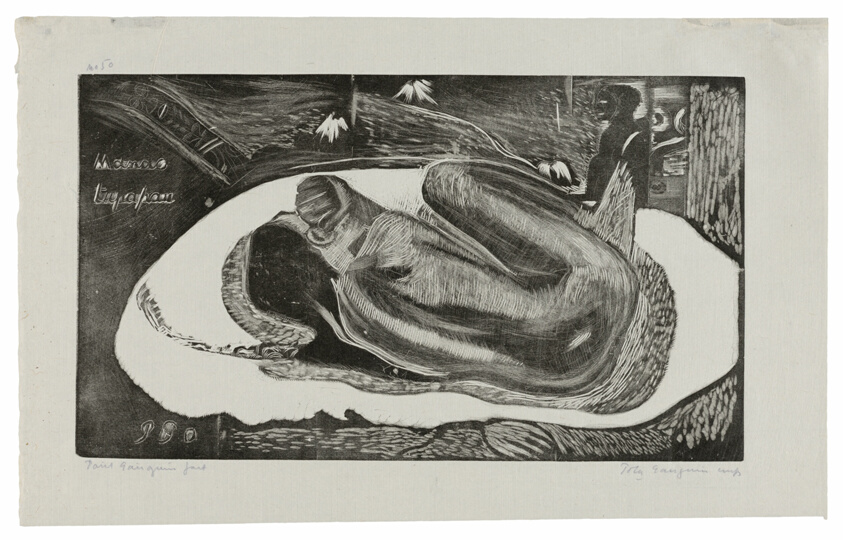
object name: Print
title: Manao tupapau (She Thinks of the Ghost or The Ghost Thinks of Her), from the Noa Noa Suite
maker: Paul Gauguin (French, 1848-1903); printed by Pola Gauguin (Danish, born France, 1883-1961); published by Christian Cato, Copenhagen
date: 1893/94, printed and published 1921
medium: Wood-block print in black ink on grayish-ivory China paper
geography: France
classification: woodcut; print; prints and drawing